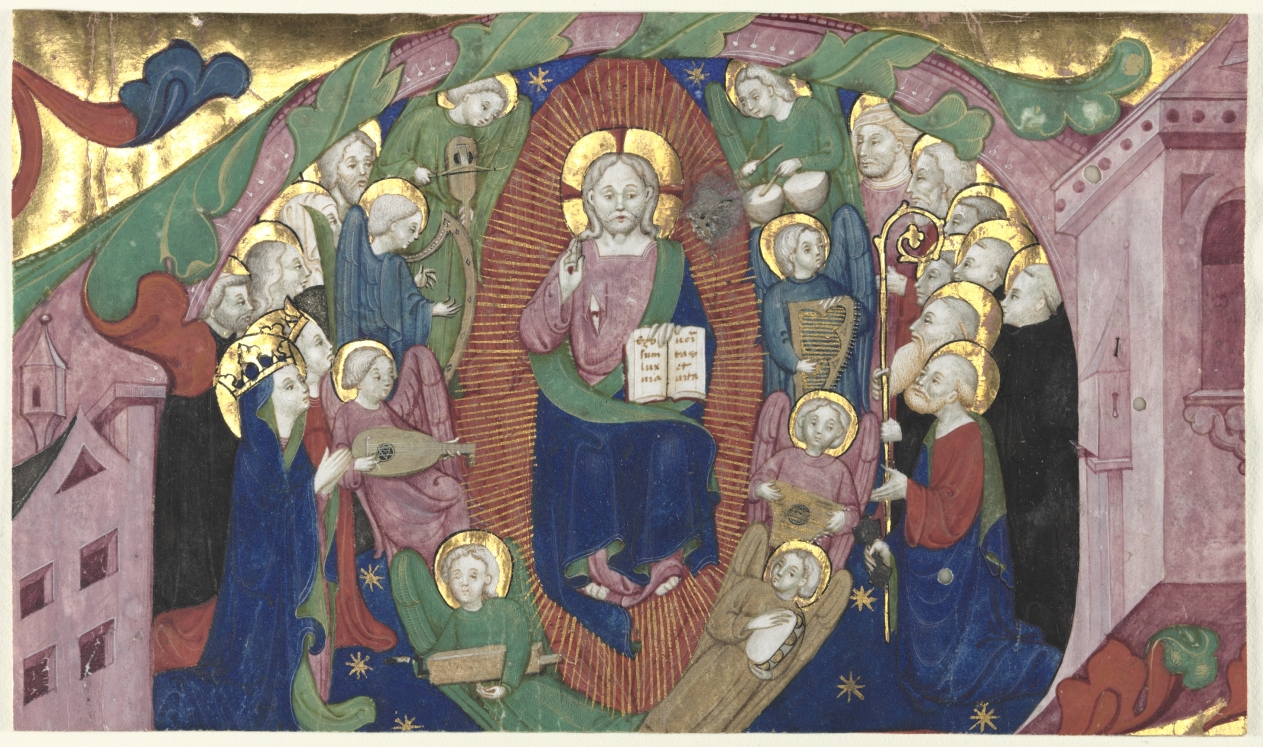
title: Fragment of a Historiated Initial from a Choir Book: Christ in Majesty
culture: Italy, Lombardy, 15th century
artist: attributed to Michelino Molinari da Besozzo (Italian, c. 1385–1445)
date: c. 1400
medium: ink, tempera, and gold on parchment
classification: Manuscript